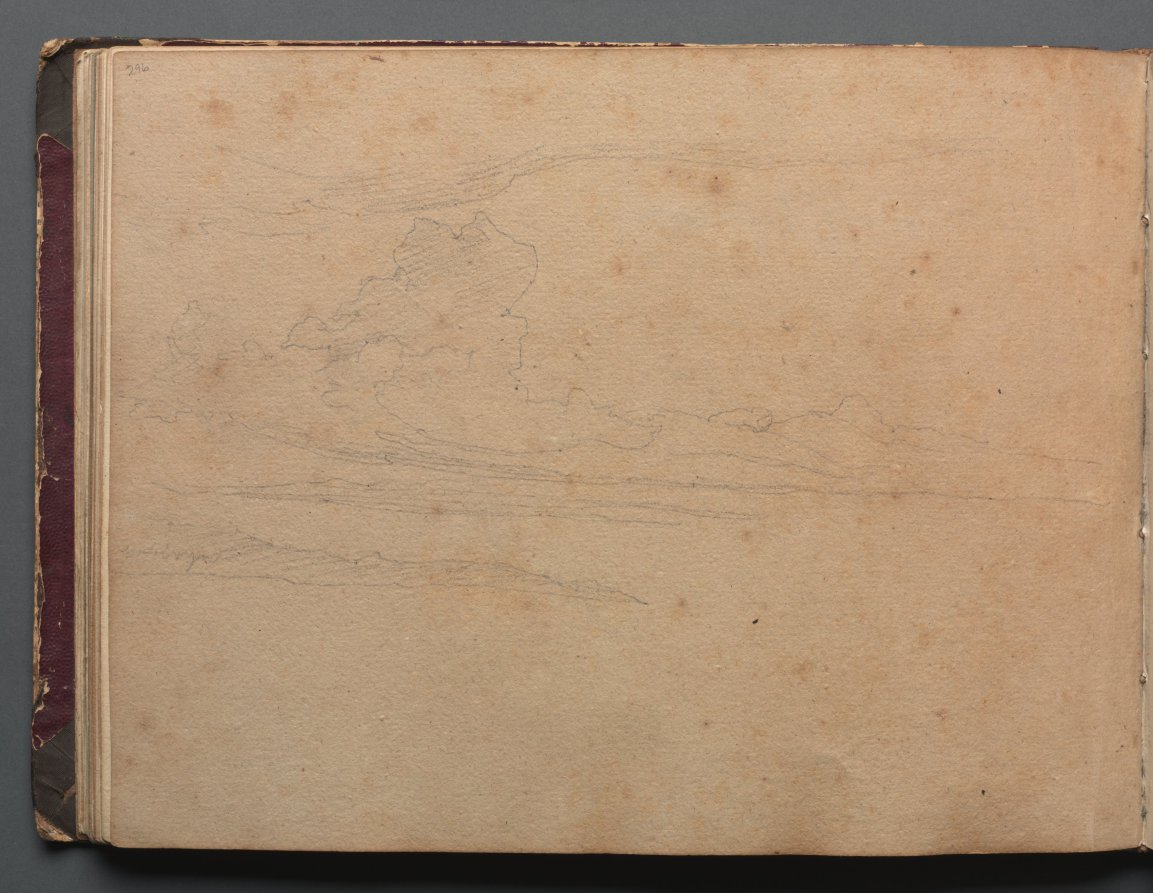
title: Album with Views of Rome and Surroundings, Landscape Studies, page 29b: Landscape Study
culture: Germany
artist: Franz Johann Heinrich Nadorp (German, 1794–1876)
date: c. 1830s-70s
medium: graphite on brown paper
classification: Bound Volume